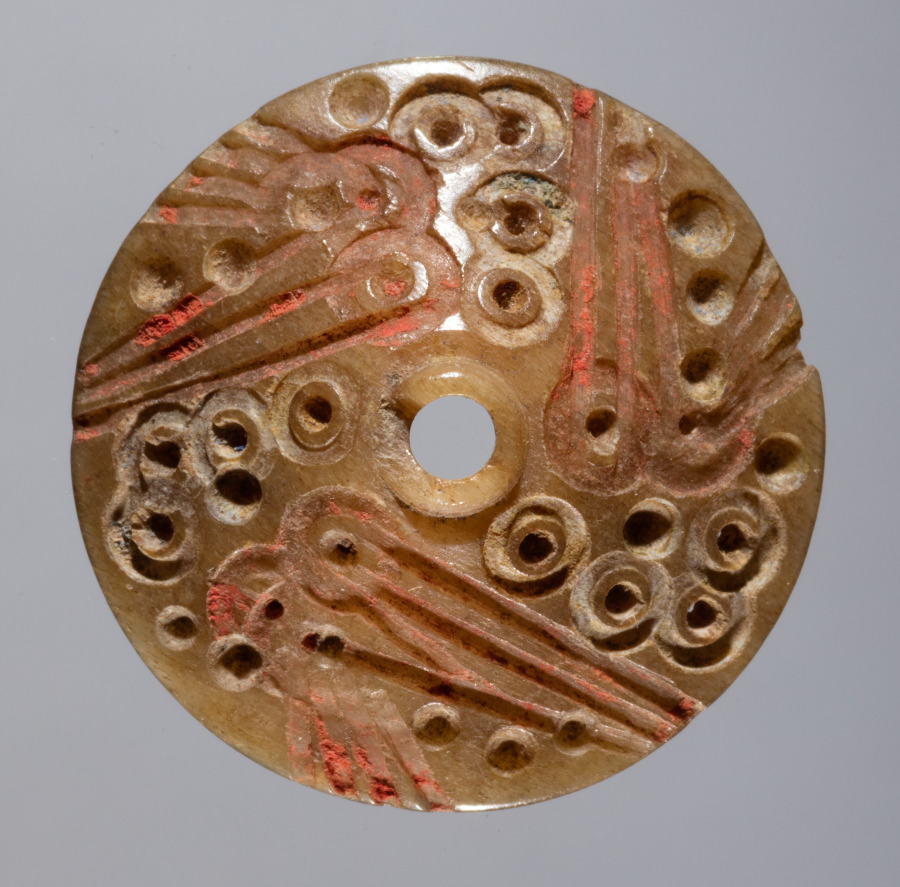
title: Spindle Whorl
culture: Iran, early Islamic period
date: 700s - 900s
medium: bone, incised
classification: Spindle Whorl